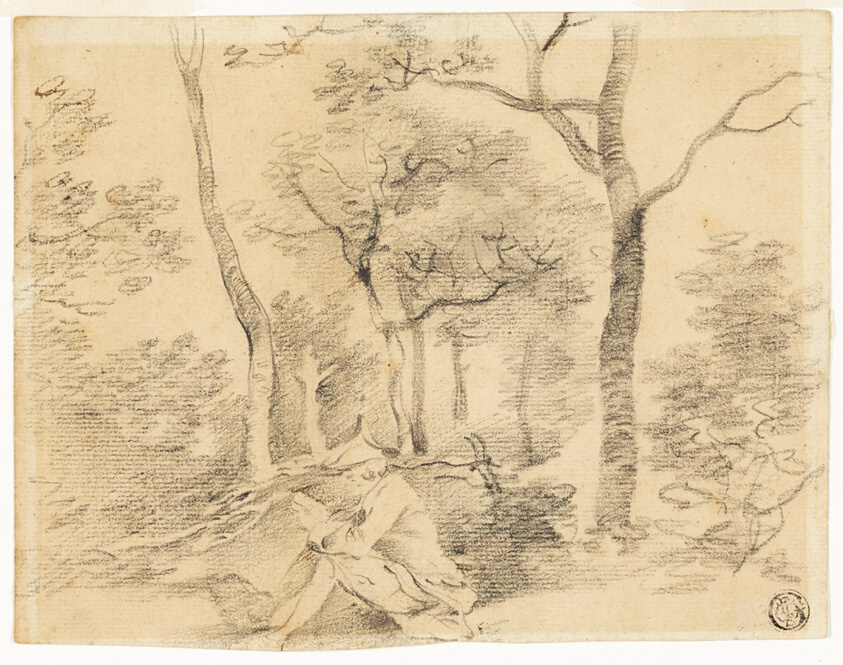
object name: Drawing and Watercolor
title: Gainsborough Sketching in Woods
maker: Attributed to Thomas Gainsborough; English, 1727-1788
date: c. 1747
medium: Black crayon on cream laid paper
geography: England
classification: crayon; drawings (visual works); prints and drawing